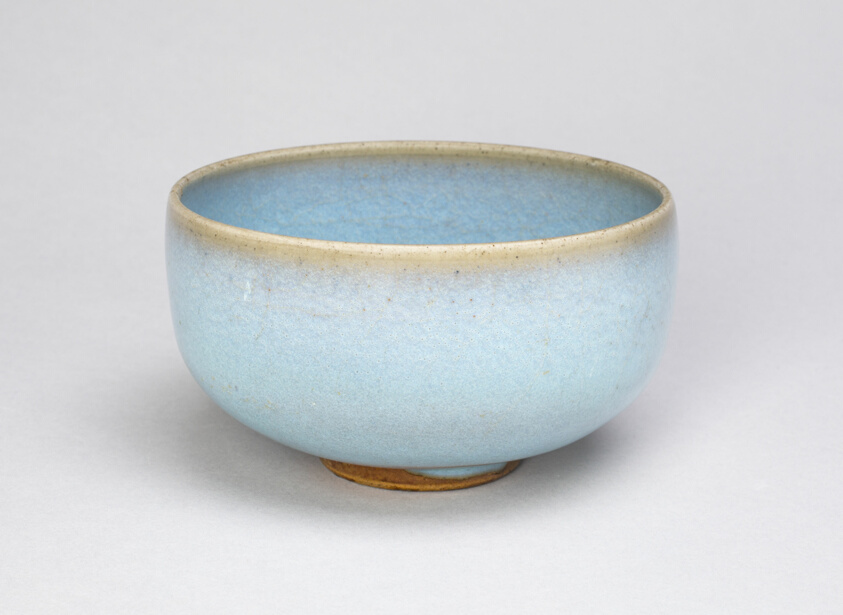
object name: Vessel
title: Bowl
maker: China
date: Jin dynasty (1115–1234), 13th century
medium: Jun ware; stoneware with pale-blue and pinkish-red glazes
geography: China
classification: bowl; stoneware; dish (vessel); asian art; ceramics; vessel